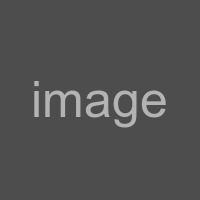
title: Sinhalese Man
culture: India, 19th century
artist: Scowen & Co. (British, active Ceylon, 1876–1895)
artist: or Skeen & Co. (British, active 1860–1920)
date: c. 1880s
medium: albumen print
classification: Photograph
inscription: Written in pencil on verso: “126”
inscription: Written in pencil on verso: “Singhalese”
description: The gentleman sports a Western jacket and shirt, but his distinctive hairstyle identifies him as Sinhalese, a people originally from northern India who now form the majority of the population of Sri Lanka.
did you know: Formally posed in a studio in profile, rather like a specimen, the image is more likely an anthropological study than a commissioned portrait.